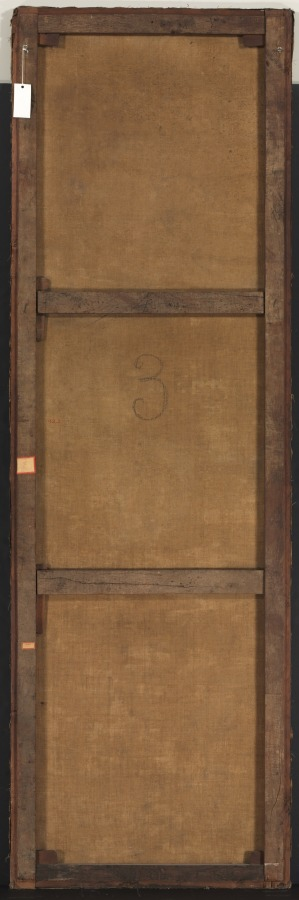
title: Decorative Panel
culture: France, 18th century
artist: Pierre Rousseau (French, 1751–1829)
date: 1790s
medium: oil on canvas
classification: Painting